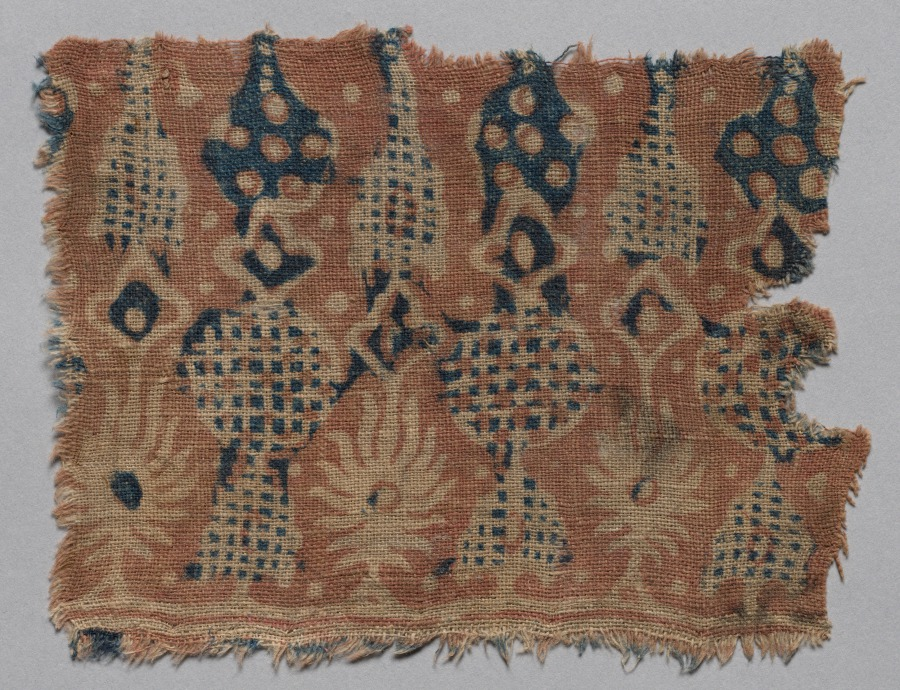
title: Fragment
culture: India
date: 1100s–1300s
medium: Cotton: plain cloth, resist dyed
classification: Textile